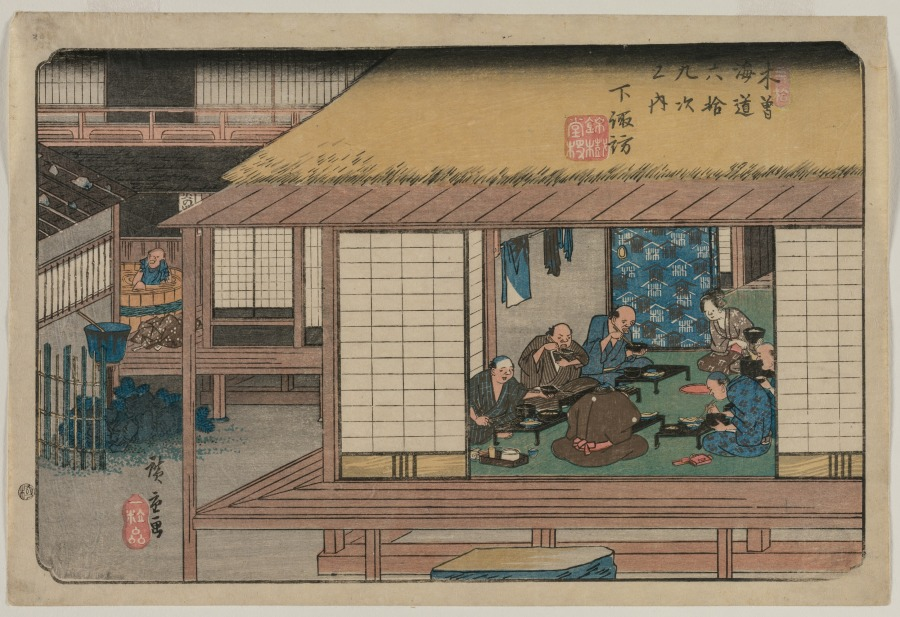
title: Shimosuwa, from Sixty-Nine Stations of the Kisokaidō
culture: Japan, Edo period (1615–1868)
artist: Utagawa Hiroshige (Japanese, 1797–1858)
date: 1835–38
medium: Color woodblock print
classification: Print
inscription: Signature: Hiroshige ga. Artist Seal: Ichiryusai. Publisher: Iseya Rihei (Kinjudo han). Censorship Seal: kiwame.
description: This print shows travelers enjoying a meal at an inn, with the innkeeper looking pleased at the guests’ enthusiasm. In the background, another traveler is gratefully relaxing in a wooden tub filled with hot natural spring water, having discarded his robe next to the bath. Shimosuwa was the only stop along the Kisokaidō—a 534-kilometer (332-mile) road running from Nihonbashi in Edo (now Tokyo) to Sanjō Ōhashi in Kyoto—with a natural hot spring. The print series was a collaboration between Utagawa Hiroshige and Keisai Eisen (1790–1848).